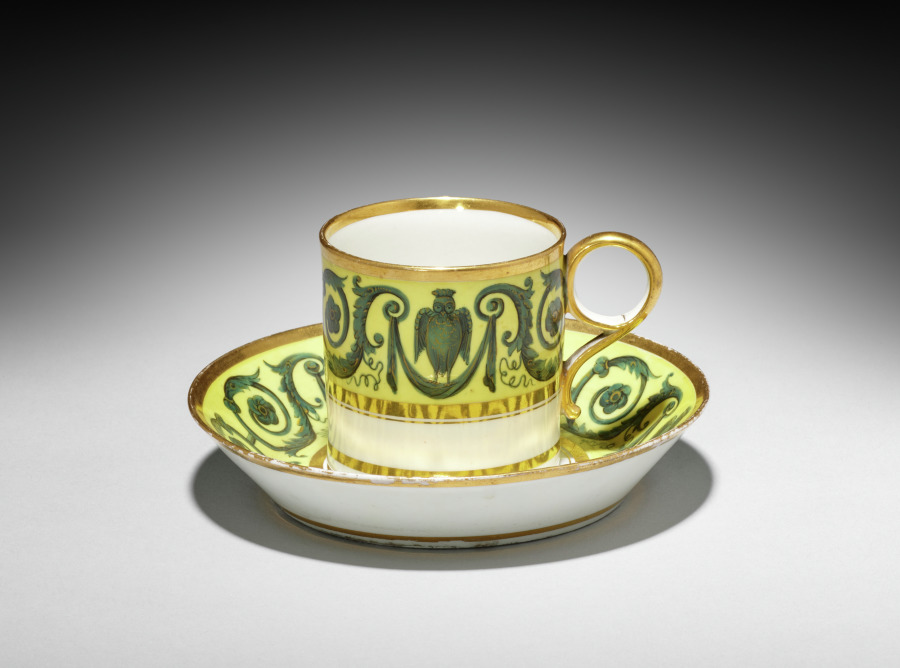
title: Cup and Saucer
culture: England, 19th century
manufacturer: Worcester Porcelain Factory (British, established 1751)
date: 1807–13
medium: porcelain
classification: Ceramic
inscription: in overglaze red: "Barr, Flight and Barr/ Royal Porcelain Works/ Worcester/ London -- House/ Flight & Barr/ Coventry Street," surrounded by: "Manufacturers to their Majesties Prince of Wales and Royal Family. Established 1751."